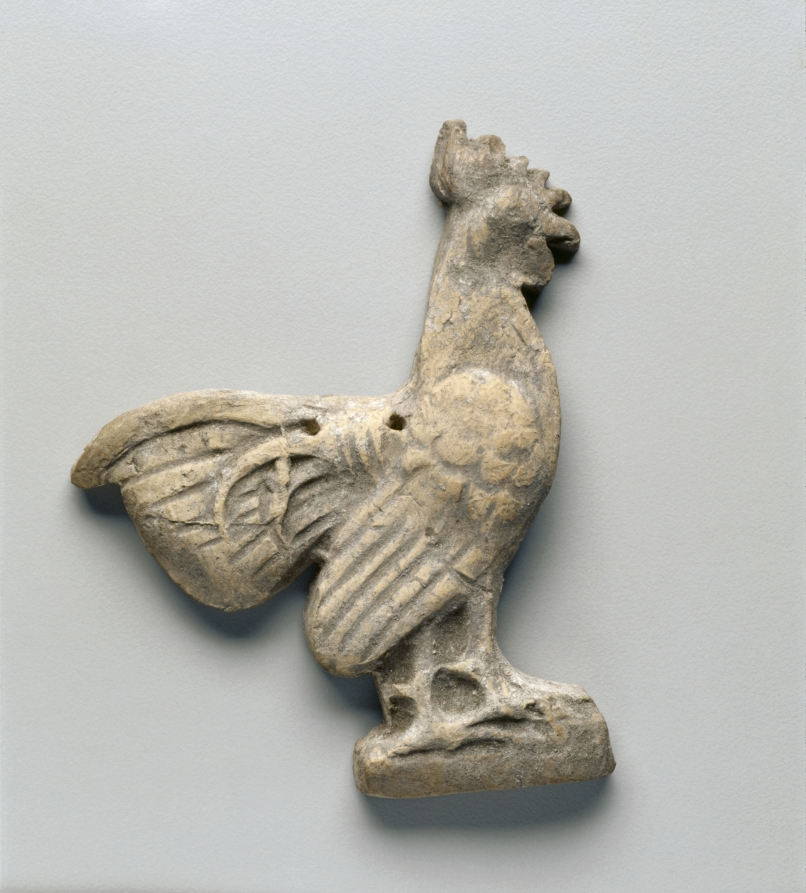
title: Cock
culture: Greece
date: 500s BCE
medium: terracotta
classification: Sculpture